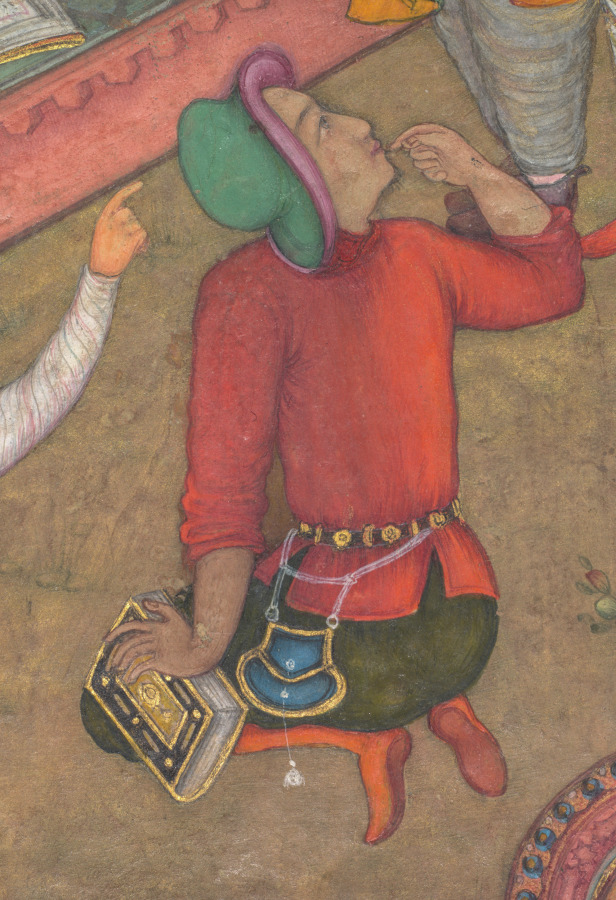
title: John the Baptist recognizes Christ by the appearance of a dove (folio 50 verso), from a Mirror of Holiness (Mir’at al-quds) of Father Jerome Xavier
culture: Mughal India, Allahabad, made for Prince Salim (1569–1627)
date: 1602–4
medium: Gum tempera, ink, and gold on paper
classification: Manuscript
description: Wearing the black robes and cap of a Jesuit priest, John the Baptist sits in a well-appointed Mughal-style courtyard. According to Father Jerome’s text, John recognizes Jesus by the dove who sits on his head. Possibly Father Jerome intended to relate the Gospel account that describes the dove of the Holy Spirit as hovering in the air above his head. The artist’s own reactions to this passage may be reflected in the expressions and gestures of the onlookers, who seem incredulous and bemused at this sign.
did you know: Jesus holds a rosary with a cross even in scenes prior to his crucifixion.